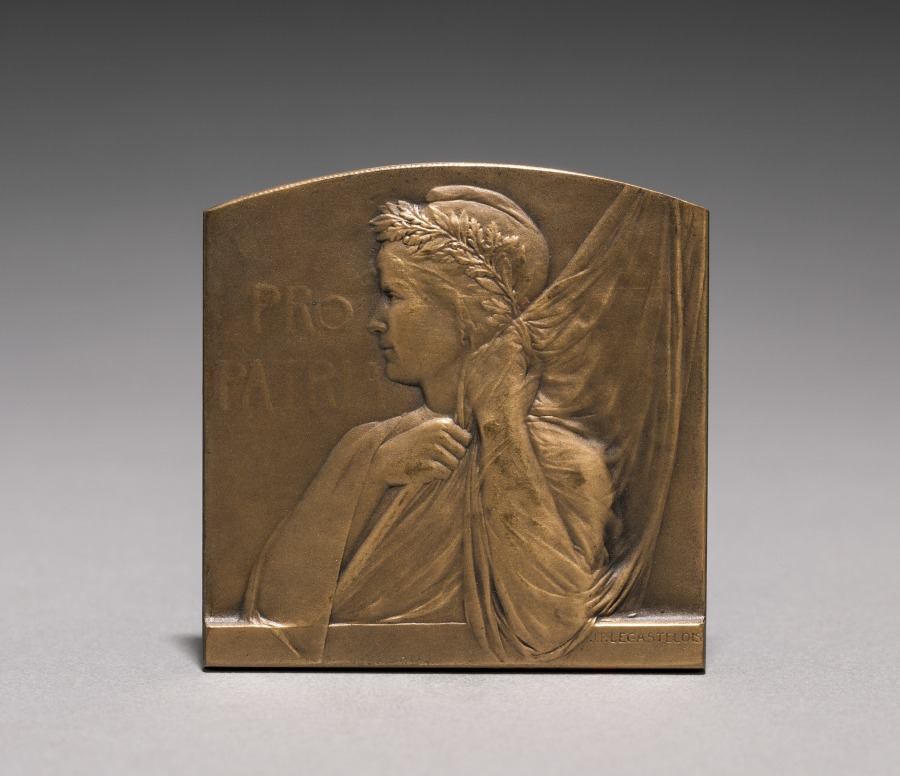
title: Medal (obverse)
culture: France, 19th century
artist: Jules Prosper Legastelois (French, 1855–1931)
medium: bronze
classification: Metalwork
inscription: "Pro Patria."